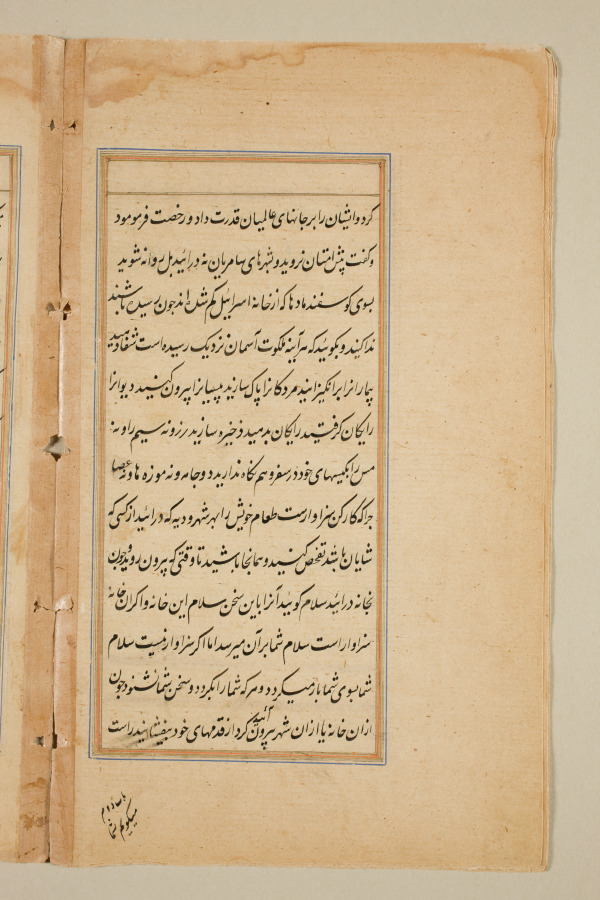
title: Text page from a Mirror of Holiness (Mir’at al-quds) of Father Jerome Xavier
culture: Mughal India, Allahabad, made for Prince Salim (1569–1627)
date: 1602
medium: Ink and gold on paper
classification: Manuscript